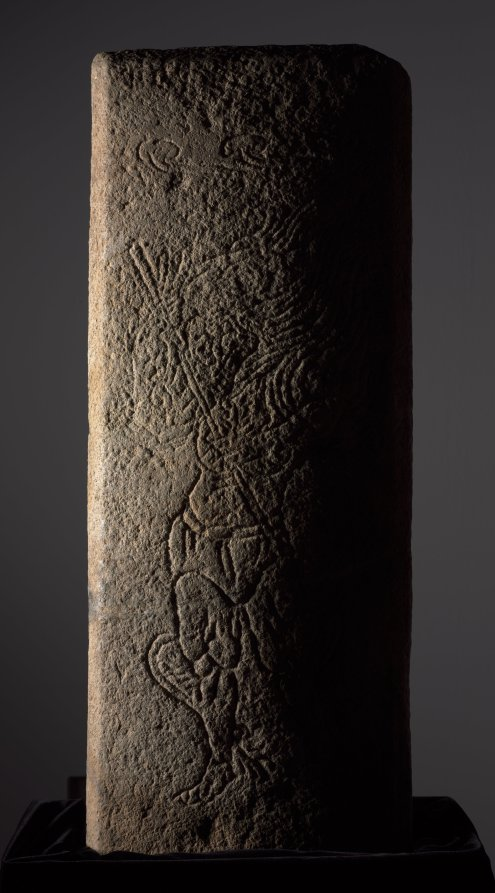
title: Stone Panel for Royal Tomb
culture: Korea, Unified Silla period (676-935)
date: late 700s-early 800s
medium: granite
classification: Sculpture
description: This panel shows a figure with a human body and the features of a rat, which is one of the signs of the Asian zodiac, and is likely one of 12 granite panels from a royal tomb. It is probably from Gyeongju—the capital of the kingdoms of the Silla (57 BCE–668) and Unified Silla (688–935) periods—where large royal tomb mounds can still be found. This panel resembles those showing the animal signs of the Korean zodiac from the tomb of General Kim Yusin (595–673) in Gyeongju, the most famous tomb of the period.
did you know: A rat, one of the signs of the East Asian zodiac, carved in this stone panel symbolizes wealth.